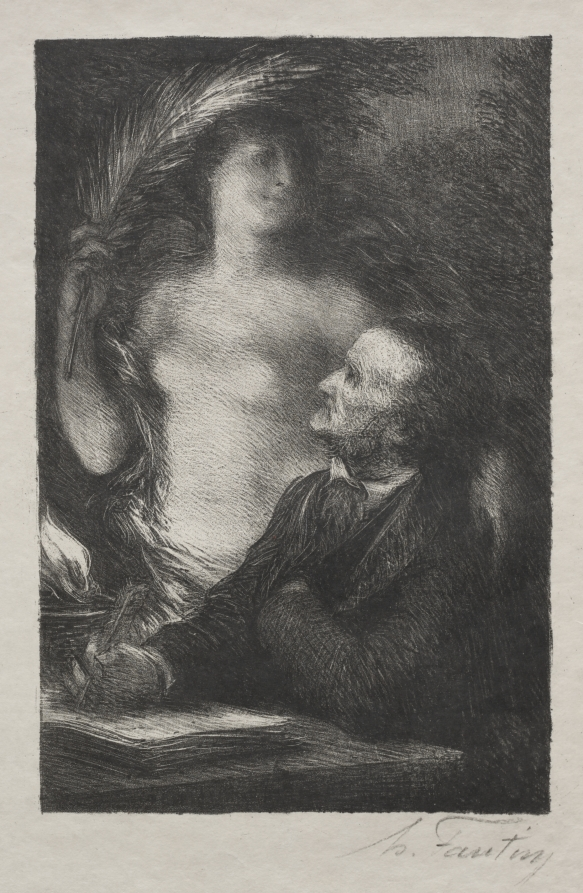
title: The Muse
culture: France, 19th century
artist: Henri Fantin-Latour (French, 1836–1904)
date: 1887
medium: lithograph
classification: Print